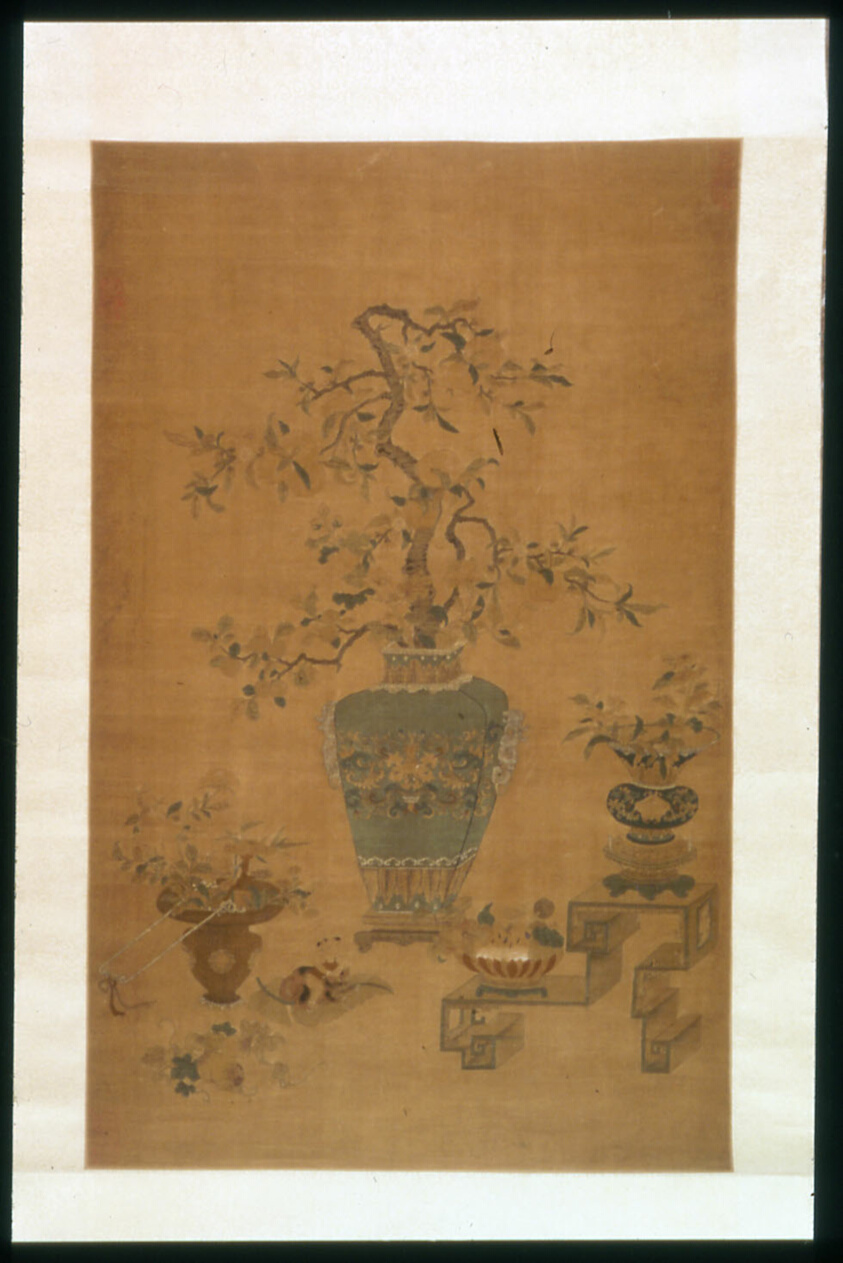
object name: Textile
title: Hanging Scroll (Furnishing Fabric)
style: qing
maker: China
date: Qing dynasty (1644–1911), 1801/50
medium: Silk and gold-leaf-over-lacquered-paper-strip-wrapped silk, slit and single dovetailed tapestry weave with interlaced outlining wefts; painted details; mounting: silk, 4:1 satin damask weave; outer edge mounting: silk, plain weave; outer wrapper: silk and gold-leaf-over-lacquered-paper-strip-wrapped silk, warp-float faced 6:1 satin weave with supplementary brocading wefts bound in plain interlacings; inner wrapper: silk, plain weave; wooden scroll ends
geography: China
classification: textile; weaving; furnishing textile